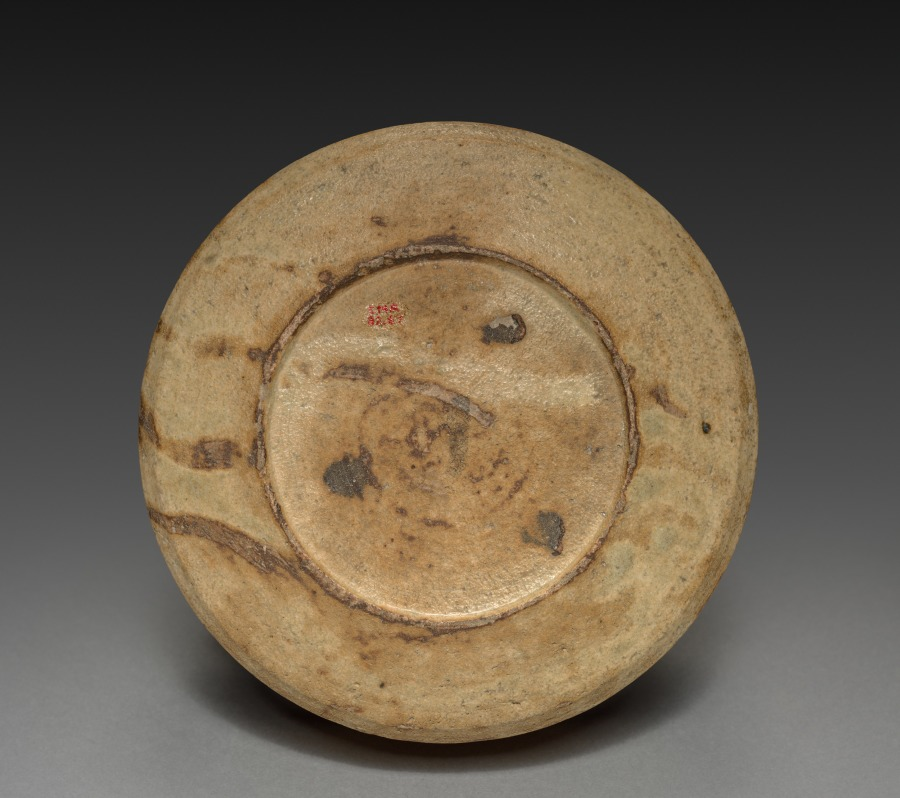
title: Bowl: Yellow Seto Ware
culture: Japan, Momoyama period (1573–1615)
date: c. 1590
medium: glazed stoneware with incised decoration (Seto ware)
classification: Ceramic